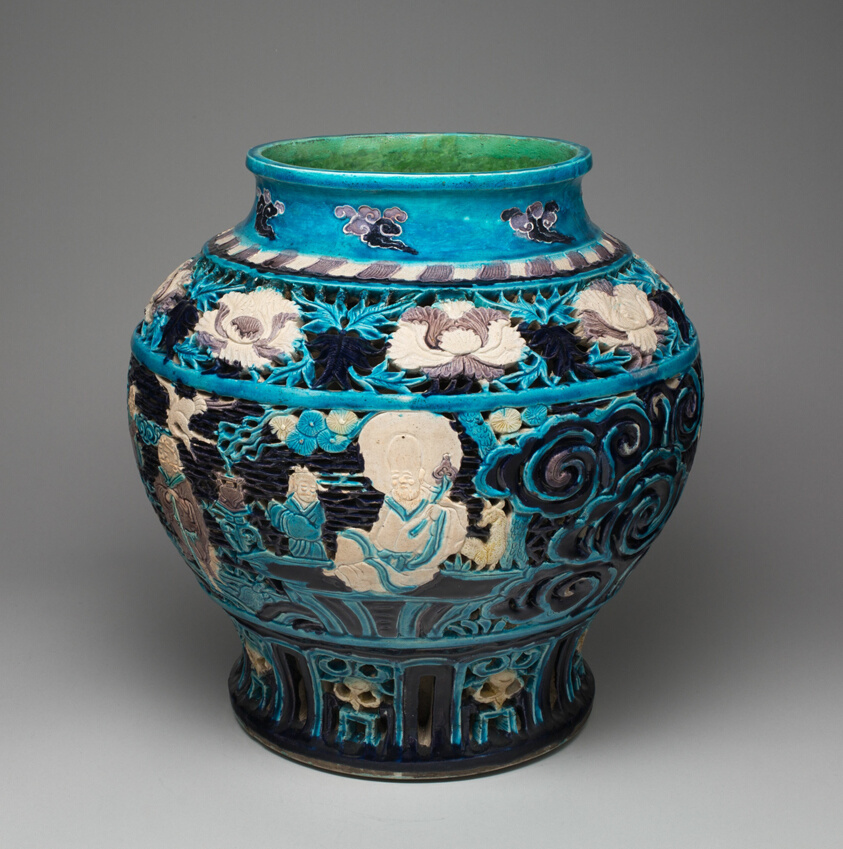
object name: Vessel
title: Jar with Eight Immortals and Peonies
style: Chinese (culture or style)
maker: China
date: Ming dynasty (1368–1644), 16th century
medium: Fahua ware; stoneware with biscuit outlines and underglaze openwork decoration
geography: China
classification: stoneware; ceramics; asian art; vessel